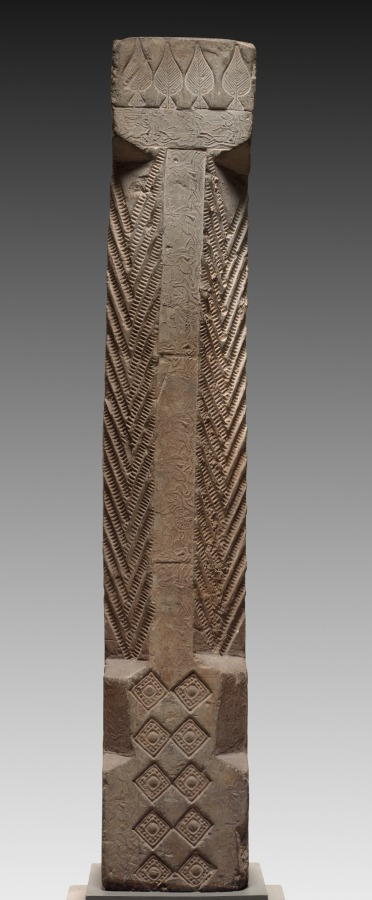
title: Hollow Tile: Column from Tomb-Chamber Doorway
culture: China, Han dynasty (202 BCE–220 CE)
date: 100–200 CE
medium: earthenware, die-stamped relief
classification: Ceramic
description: Striding tigers (top), racing horsemen (right column), and reverent officials (left column) are stamped into the surface of this underground portal to a tomb. The doorway preserves in stone the post-and-lintel structure, a basic element of Chinese wooden architecture. By the first century CE, a revolution in Chinese tomb construction and furnishing had taken place. Tombs lined with decorated bricks and tiles replace the earlier tombs constructed with only rammed-earth walls. Ceramic surrogates or models of stoves, houses, servants, and pets filled these more durable chambers, symbolically extending the creature comforts of this world into the world after death.